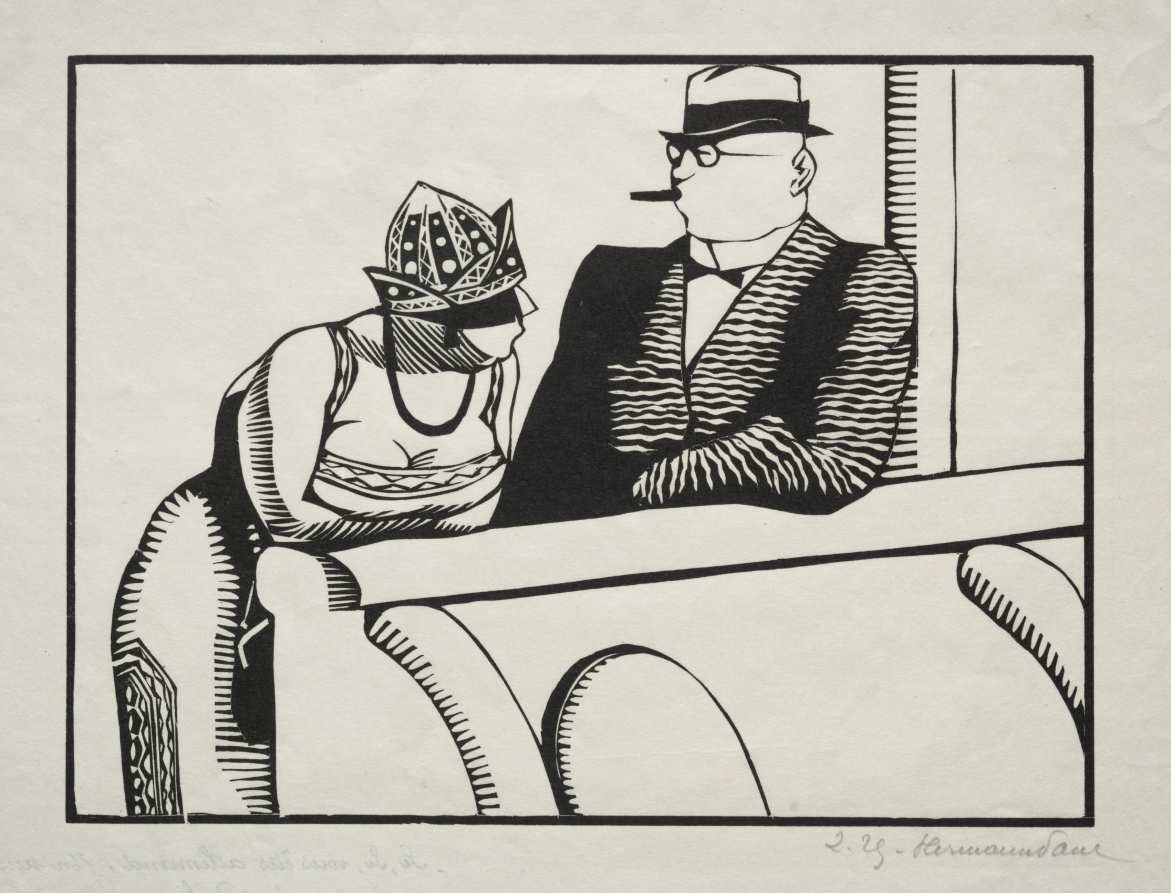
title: You are German, I am sure of it: I am from Berlin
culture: France, 20th century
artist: Hermann-Paul (French, 1864–1940)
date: c. 1920s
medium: woodcut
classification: Print